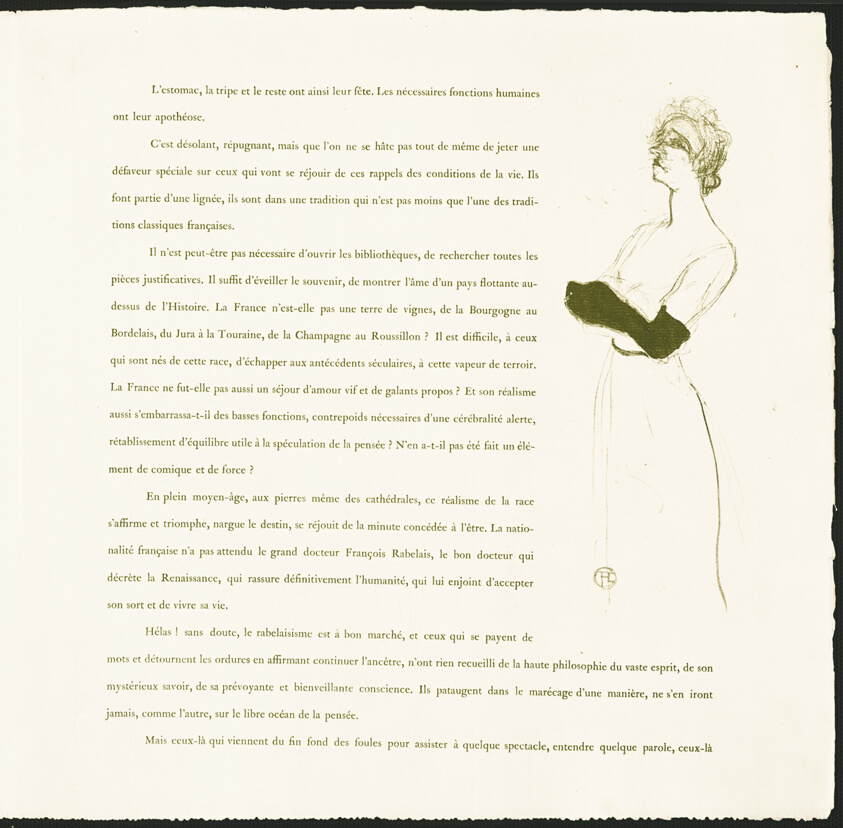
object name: Print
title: Yvette Guilbert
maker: Henri de Toulouse-Lautrec (French, 1864-1901)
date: 1894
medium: Color lithograph, with letterpress, on ivory laid paper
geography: France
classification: lithograph; print; prints and drawing